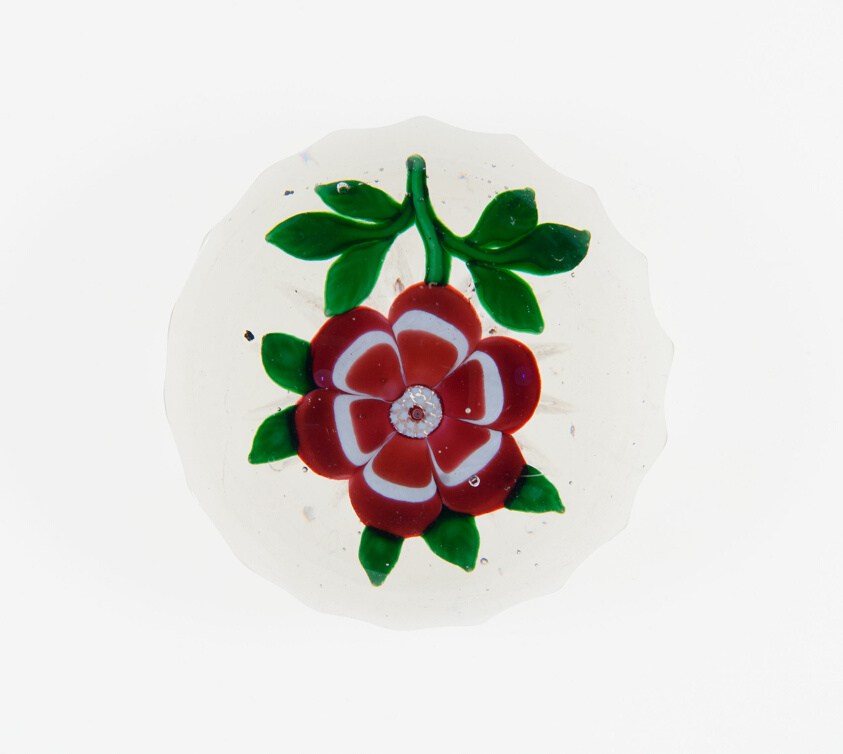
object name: Glass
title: Paperweight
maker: Baccarat Glassworks (Cristalleries de Baccarat); Lorraine, France, founded 1764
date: c. 1848–55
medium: Glass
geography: Baccarat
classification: paperweight; glass